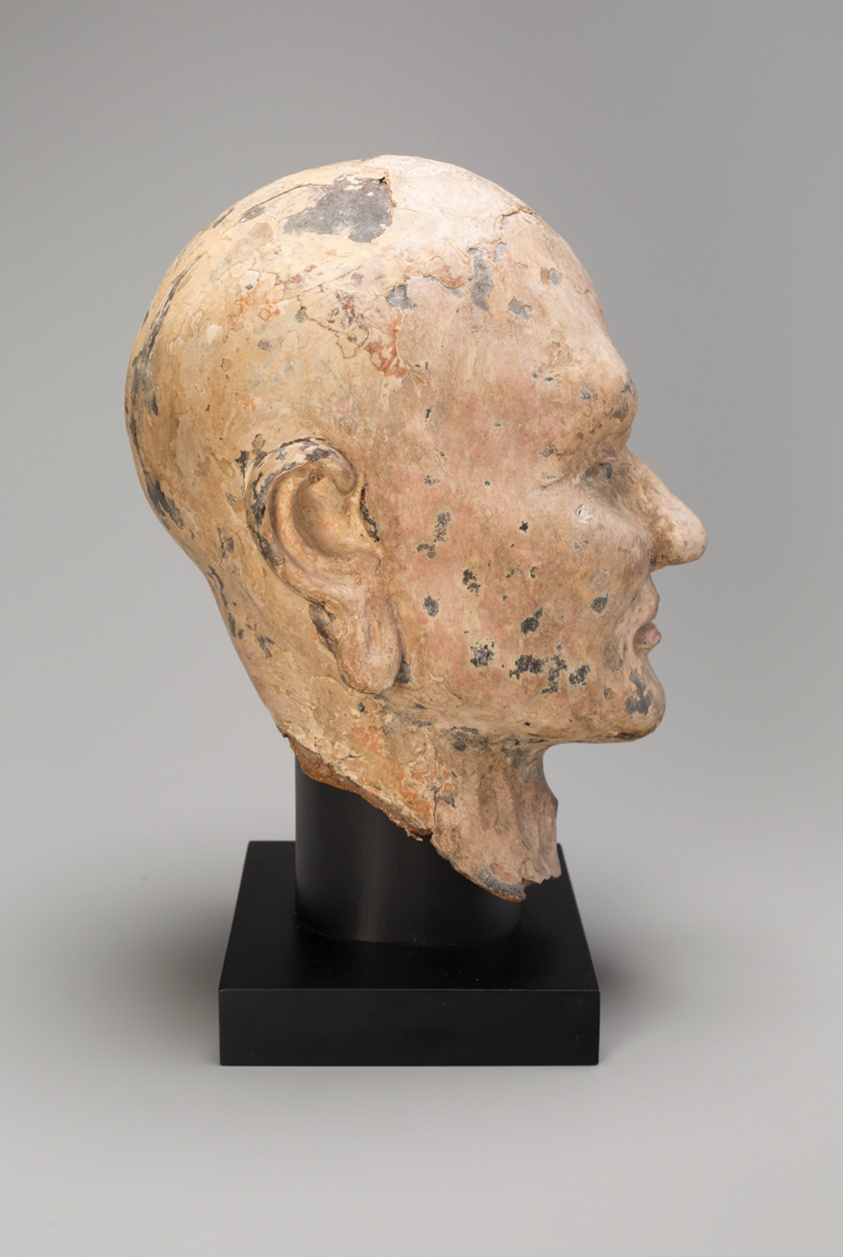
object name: Sculpture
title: Head of Luohan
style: Chinese (culture or style)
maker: China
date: Northern Song, Liao, or Jin dynasty, c. 11th century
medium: Hollow dry lacquer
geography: China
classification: lacquer; sculpture; asian art